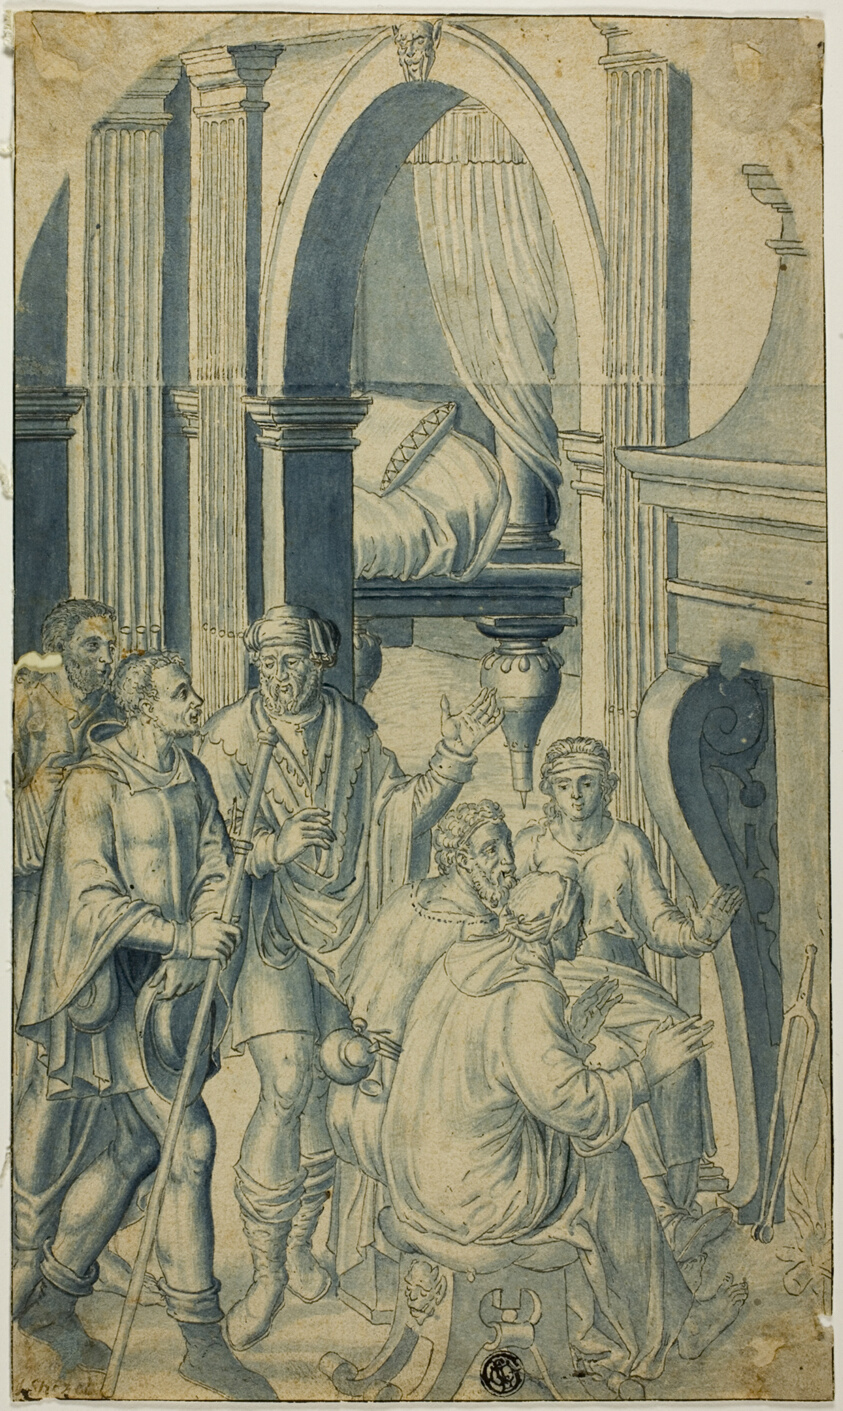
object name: Drawing and Watercolor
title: Miracle of the Host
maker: Jan van Scorel (Netherlandish, 1495-1562); or Marcus Geeraerdts, the elder (Flemish, 1516-1604); or style of Lambert van Noort (Netherlandish, 1520-1571)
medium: Pen and black ink, with brush and blue wash, on ivory laid paper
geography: Netherlands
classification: ink or chalk wash; drawings (visual works); prints and drawing